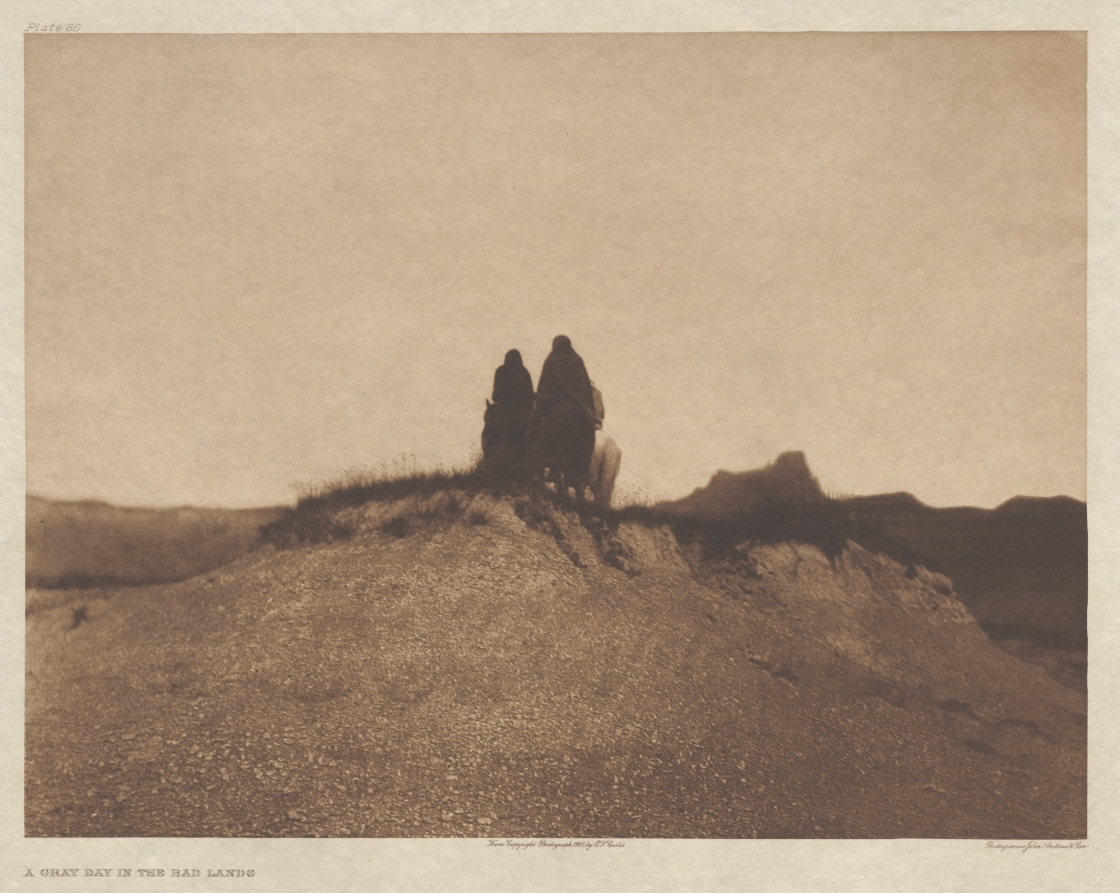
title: Portfolio III, Plate 86 / A Gray Day in the Bad Lands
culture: America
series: The North American Indian: being a series of Portfolios picturing and describing the Indians of the United States, the Dominion of Canada, and Alaska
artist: Edward S. Curtis (American, 1868–1952)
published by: The University Press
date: 1905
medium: photogravure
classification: Portfolio